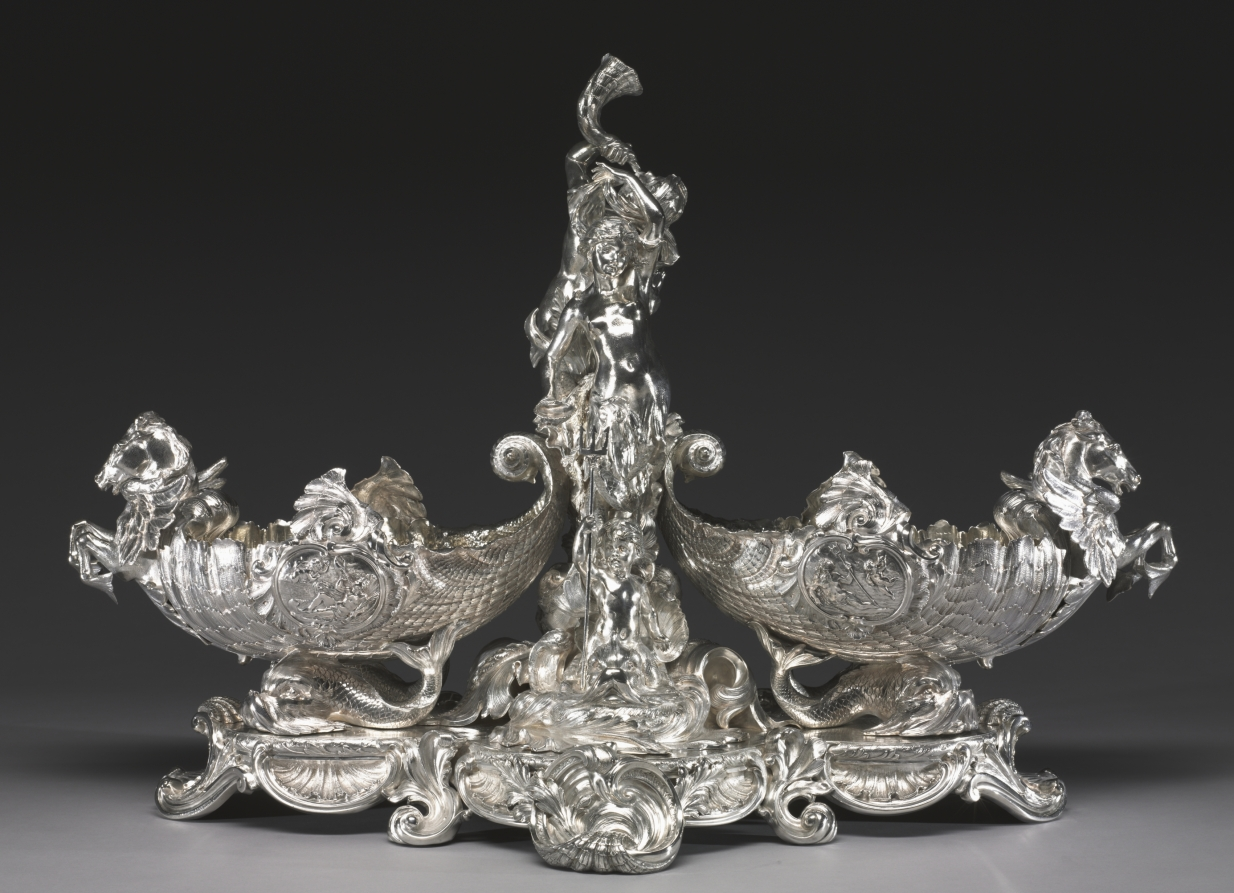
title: Centerpiece from the Nereid Service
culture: England, late 19th-early 20th century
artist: Goldsmith's & Silversmith's Company (British)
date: c. 1900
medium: silver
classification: Silver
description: Originally thought to have been made by the early 19th-century London silversmith Paul Storr because it had been marked with spurious Storr hallmarks, more recent scholarship has revealed that this service, representing the triumph of Great Britain on the high seas through the allegorical images of Grecian nymphs (nereids), was actually made to display at the 1900 world's fair in Paris. Such nationalistic fervor permeated design at the turn of the 20th century, especially in the years leading up to the First World War, when national pride was brought to its heels in Europe through a devastating conflict.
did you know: This centerpiece is actually the product of many hands since the Goldsmiths' and Silversmiths' Company operated as a cooperative of silversmiths who sold their work through the company.